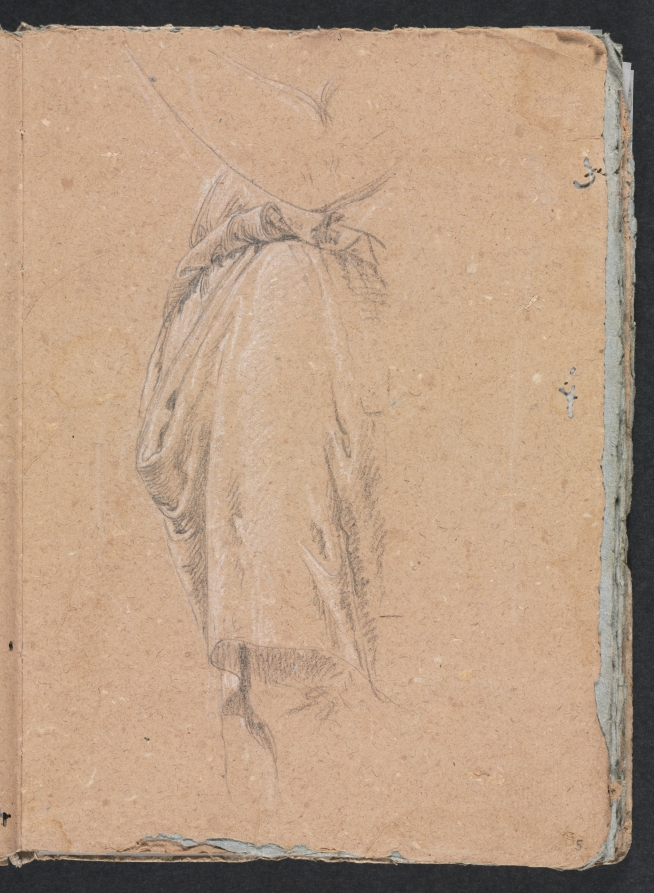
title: Verona Sketchbook: Drapery study with elbow (page 5)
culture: Italy, 18th century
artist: Francesco Lorenzi (Italian, 1723–1787)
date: 1760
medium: black chalk with white heightening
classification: Bound Volume